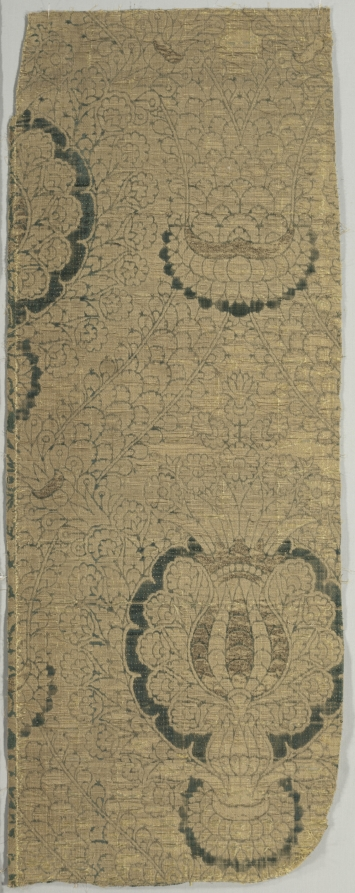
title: Velvet Fragments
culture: Spain, early 16th century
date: early 16th century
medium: velvet (cut, voided, and brocaded): silk and gold thread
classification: Velvet